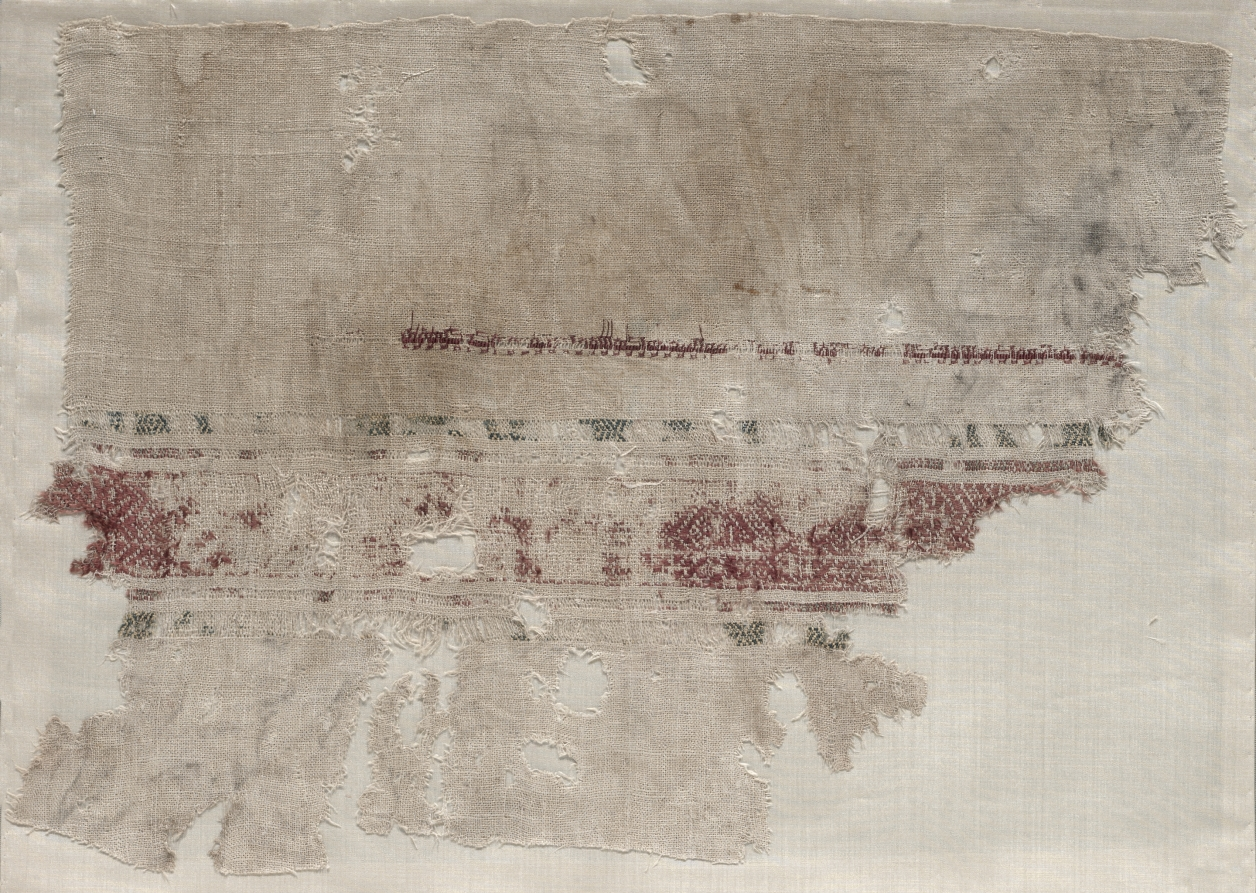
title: Fragment of a Tiraz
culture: Egypt, Tunah, Ikhshidid period, Caliphate of al-Qahir or al-Radi, AH 320-329 (A.D. 932-940)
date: 932–40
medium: silk embroidery on linen tabby ground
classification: Embroidery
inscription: [In the name of God the Merci]ful, the Compassionate. Help from God to the servant of God Muhammad the imam al-. . . bi-Allah, Commander of the Believers, may God help him . . . in Tunah.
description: The design consists of a broad five partite decorative band with geometric ornamentation in red, red and green, and yellow and dark blue, and a single line of Arabic text embroidered in red on the plain ecru linen cloth. This inscription, extremely damaged and fragmentary, has been deciphered only in part.